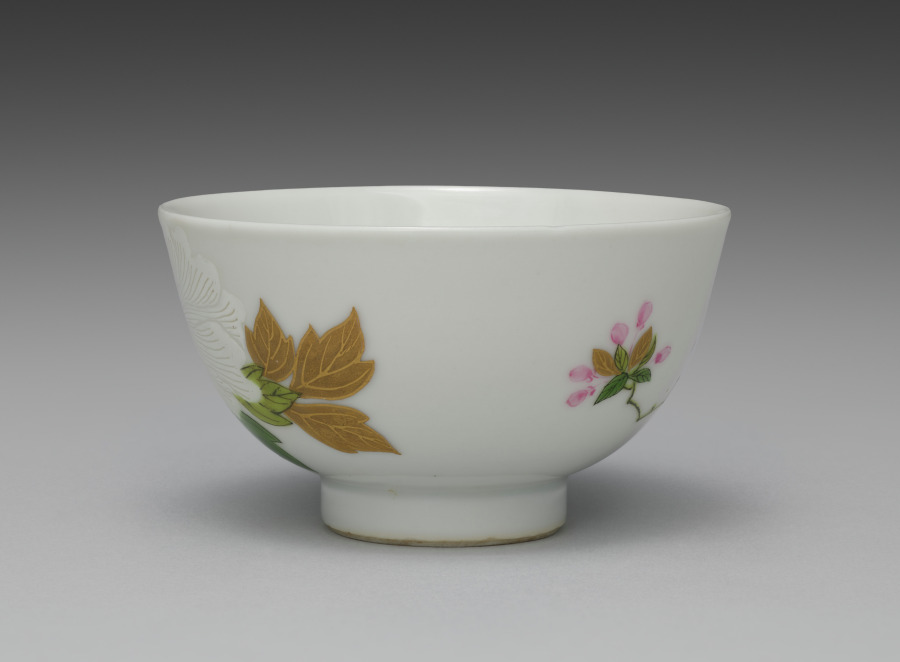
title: Teabowl from Teabowls with Peony and Crabapple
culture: Japan, Meiji period (1868–1912)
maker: Seifū Yohei III (Japanese, 1851–1914)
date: 1893–1914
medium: One from a set of five teabowls; porcelain with underglaze and overglaze color enamels and gold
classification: Ceramic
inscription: 清風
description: Overglaze color enamels are generally called iro-e (literally “color picture”) in the terminology customarily used for porcelain decoration of the Edo period. This set of teabowls is a fine example of Yohei III’s skilled use of the technique, which is identified on this set’s box lid with the alternate phrasing “porcelain with color painting” (jisaiga). Distinct from the way overglaze colors were used in Kakiemon ware from Arita, his designs and applications show a consciousness of porcelain decoration of the Qing dynasty. Here, he combines Chinese models with a sensibility taken from Kyoto ware precedents, including painting with powdered gold (kinrande). The colors used in the bowls are as follows: blue, black, gold, white, light green, green, and pink. The blue appears only inside the footring, as a double band of underglaze color. The black iron, used for stems and leaf veins, is painted over the glaze. The gold, also painted over the glaze, is used for leaves and the centers of flowers, for solid, glossy lines defining detail, or as a semimatte ground. The white of the peony flower is built up to a low relief over the glaze. Yohei has incised lines of varying widths into the pigment, carving away to the bowl’s surface, to differentiate individual petals and their rippled shapes. The light and dark greens, as well as the pink, are painted over the glaze. Of note is how Yohei has first used thinly applied lines of light green to draw the plum branch before applying the opaque iron black. For the plum buds and flowers, he has used a diluted pink with an opaque pink for outline, both over the glaze. In his later works, Yohei used pink both over and under the glaze in a manner similar to underglaze blue, and it can be challenging in some cases to discern which technique he has used. A lidded container in a private collection has a similar design but is augmented with the inclusion of white and purple magnolia blossoms. In contemplating the original decorative program of a set, of which these teabowls may have been a part, it is worth considering that perhaps not all objects included the full range of motifs. In such cases, the composition of the individual object may be best understood within the context of the extended ensemble. Here, the delicate pink plum on one side of the bowl seems slightly unbalanced with the bold white peony on the other, but when seen with other objects with the magnolia and its additional colors and shapes, it is possible to imagine a set with a complex, balanced design across multiple pieces.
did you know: Yohei III used the kinrande technique of painting with powdered gold to embellish the flowers.